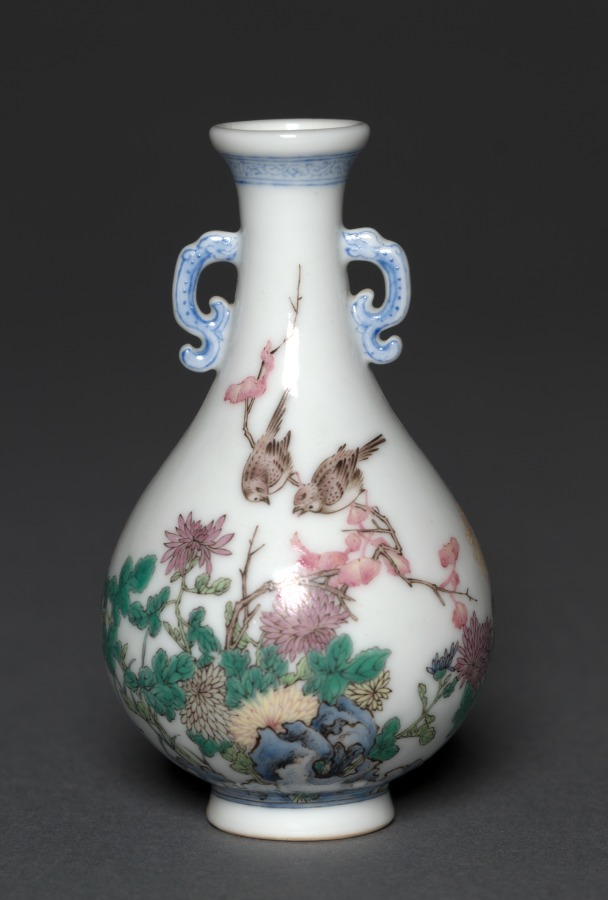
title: Pair of Miniature Vases with Birds and Chrysanthemums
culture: China, Jiangxi province, Jingdezhen kilns, Qing dynasty (1644-1911), Qianlong mark and reign (1736-95)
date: 1736–95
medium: porcelain with famille rose overglaze enamel decoration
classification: Ceramic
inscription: 乾隆年製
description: In the Qing dynasty (1644–1911), imperial patronage and a growing urban population encouraged consumption of luxury goods and local craftmanship. Luxury items became more affordable to larger parts of the society, including women, merchants, and literati in non-official positions. This pair of miniature porcelain vases with famille rose overglaze enamel decoration illustrates some of the highest technical accomplishments in Qing porcelain production.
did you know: The chrysanthemum is considered one of the "Four Noble Gentlemen" along with plum, orchid, and bamboo.